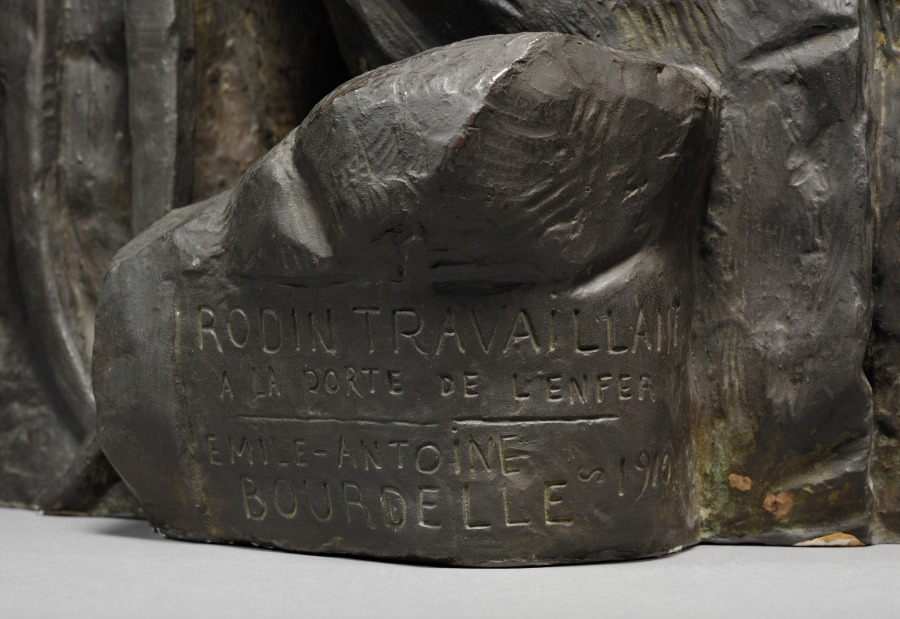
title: Rodin Working on "The Gates of Hell"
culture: France, 20th century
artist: Emile Antoine Bourdelle (French, 1861–1929)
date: 1910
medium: bronze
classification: Sculpture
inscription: Inscribed on side: "Rodin travaillant a la porte de l'enfer"; "Emile-Antoine Bourdelle, 1910"